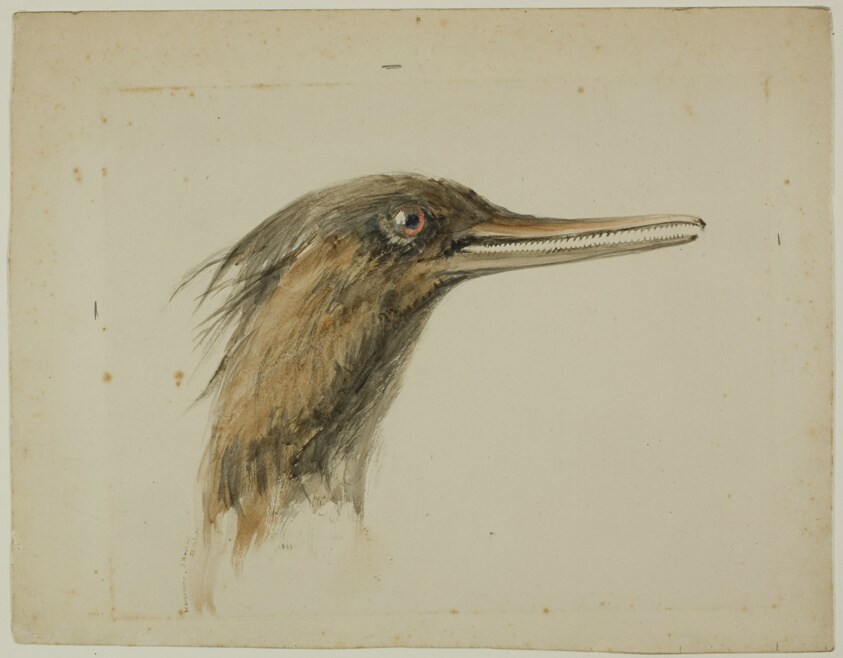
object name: Drawing and Watercolor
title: Merganser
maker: John Ruskin (English, 1819-1900)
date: February 29, 1890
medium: Watercolor, over traces of graphite, on tan wove paper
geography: England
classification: watercolor; drawings (visual works); prints and drawing